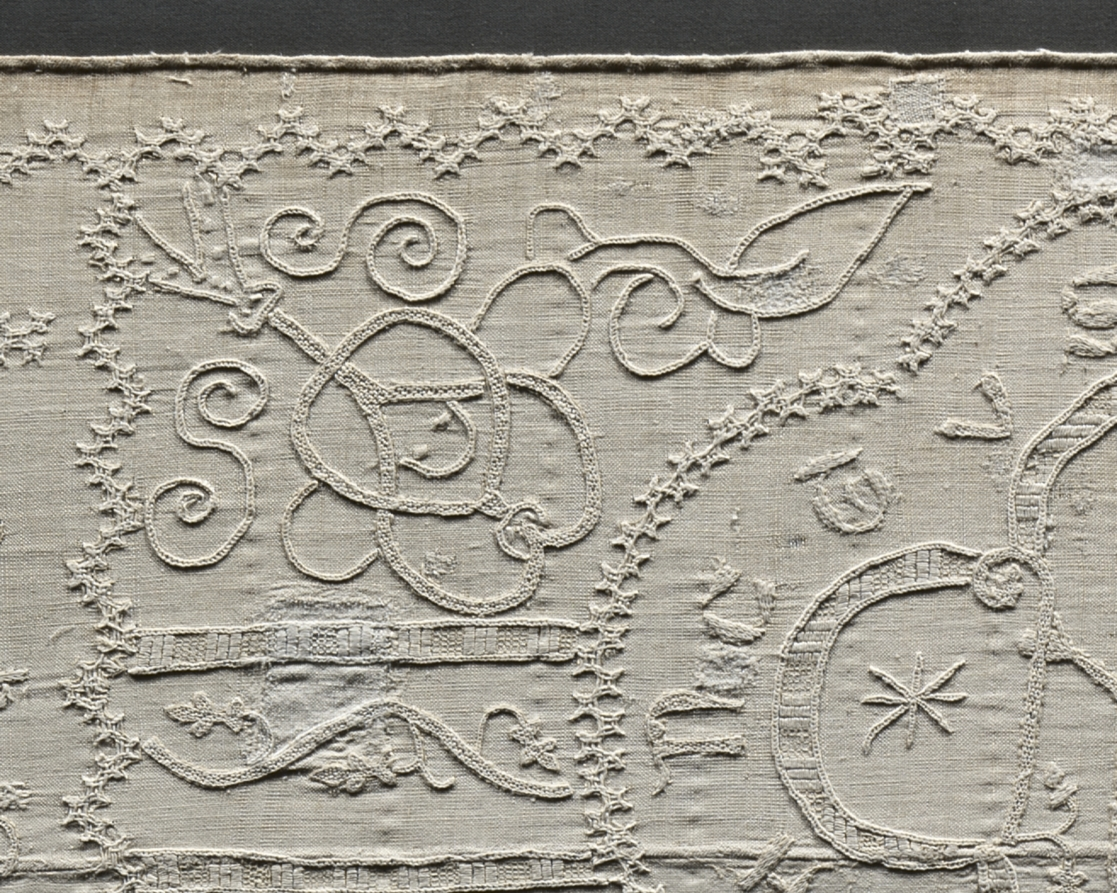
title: Altar Cloth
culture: Germany, Altenberg on the Lahn, Premonstratensian Convent, 14th century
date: c. 1350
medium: embroidery: linen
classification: Embroidery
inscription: various motifs enclosed in quatrefoils with identifying inscriptions in Gothic letters.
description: This large, embroidered altar cloth is one of the rarest, most important medieval church furnishings in existence. It was stitched by nuns in the Premonstratensian Convent in Altenberg on the Lahn River, north of Frankfurt, Germany, and was used to cover the church’s high altar in the weeks leading up to Easter. The cloth is an example of linen embroidery, a specialty of German nuns in the later Middle Ages. The Altenberg monastery church once had valuable furnishings; the high altar retable (a decorated frame with sculptures and paintings on the top of an altar) has survived, the main parts of which are now in the Städel Museum in Frankfurt, Germany.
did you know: When lit from behind, the previously hidden details emerge and the complex design becomes evident.